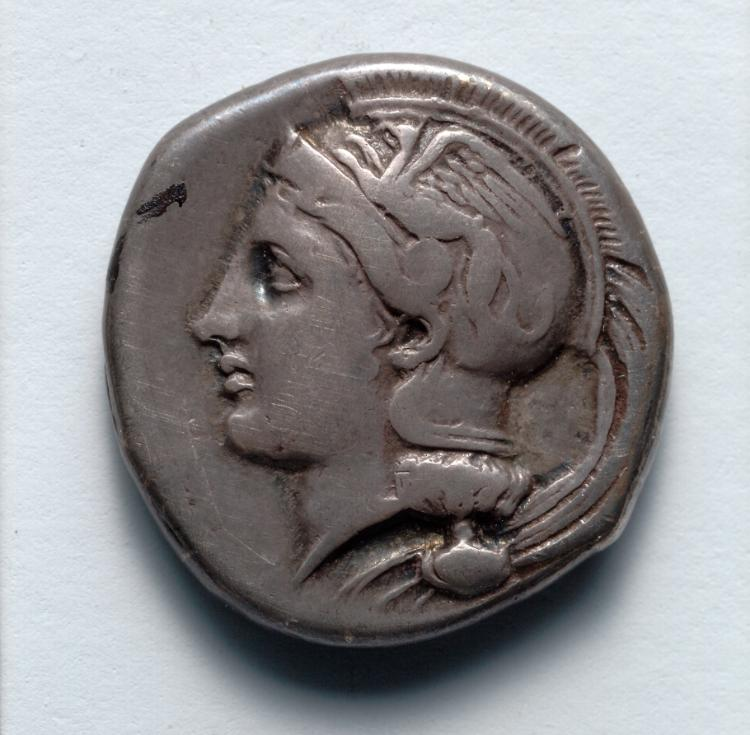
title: Stater: Head of Athena (obverse)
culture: Greek, minted at Hyele (South Italy)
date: c. 340–334 BC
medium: silver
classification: Coins